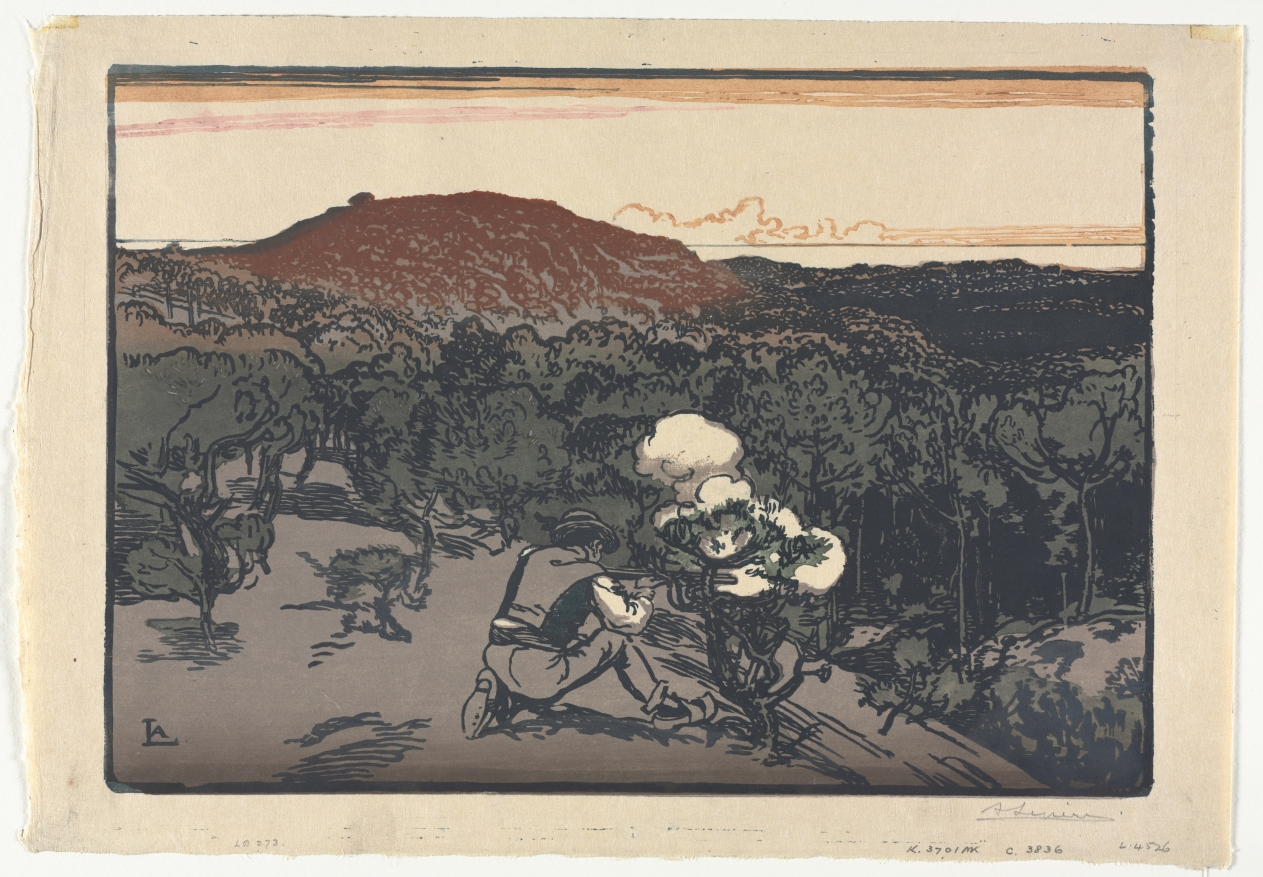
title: The Poacher, Dunes of Saint Jean de Mont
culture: France, early 20th Century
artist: Auguste Louis Lepère (French, 1849–1918)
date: 1901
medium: chiaroscuro woodcut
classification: Print